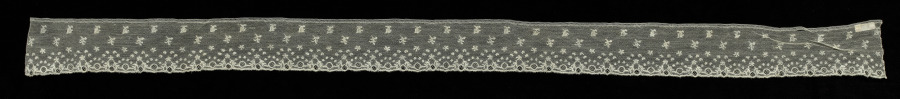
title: Lace Edging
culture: Italy, Burano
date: 1700s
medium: Linen: needle lace (Burano Point)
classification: Lace